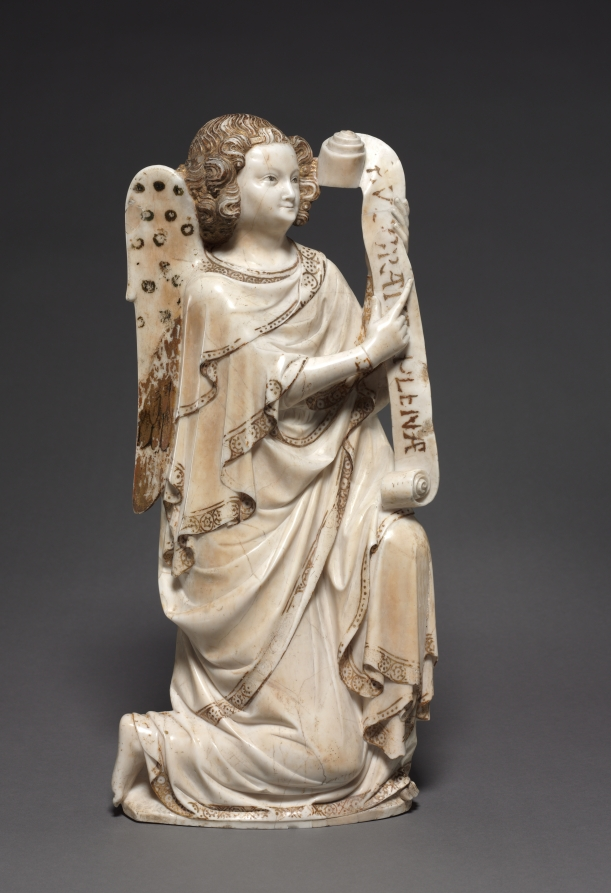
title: The Archangel Gabriel from an Annunciation Group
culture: France, Champagne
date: c. 1350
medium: alabaster with traces of paint and gilding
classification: Sculpture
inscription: Ave Maria, Gratia Plena.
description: In France, the use of alabaster began in the late 1200s for funerary monuments. The Archangel Gabriel, together with its counterpart, the Virgin Mary (now in the Louvre Museum, Paris) is part of an Annunciation. This is a rare example of alabaster sculpture from the 1300s. The alabaster comes from a quarry near Malaucène in Provence (France), making it an instance of long-distance trade of the rare material. Although the figure is very flat, it was likely made to also be viewed from the back, where there are remnants of gilding and the peacock feathers of the angel’s wing.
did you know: The surface of alabaster works can vary. By differentiating the intensity of polishing, it is possible for sculptures to create a surface with varying degrees of luster, or shine.